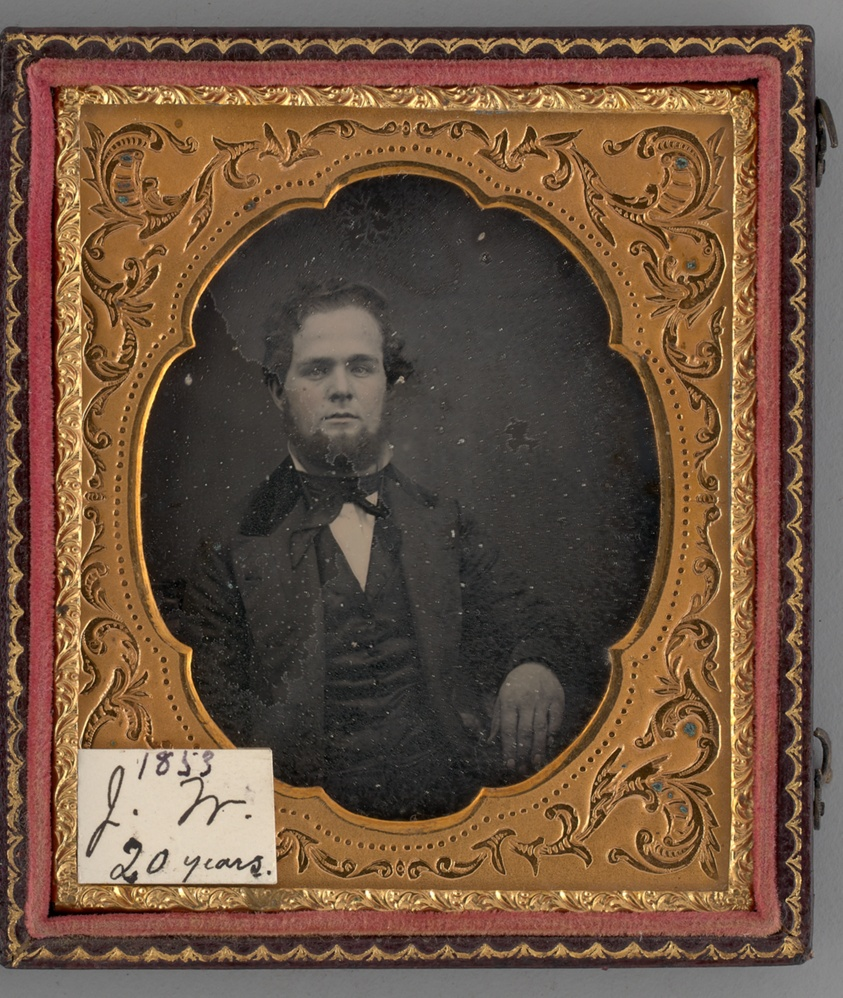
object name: Photograph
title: Untitled (Portrait of Joseph White)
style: 19th century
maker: Unknown maker; American, 19th century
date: 1854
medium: Daguerreotype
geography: United States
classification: portrait; photograph; photographic process; photography; portrait; daguerreotype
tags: lundberg collection, portraits, Male, men, photography, portrait, portraits: male subject